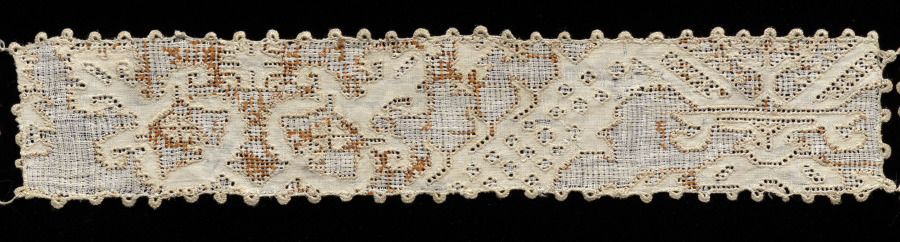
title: Lace Collar (part of a set, with cuffs)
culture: Italy, 1800s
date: 1800s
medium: Linen: needle lace (drawnwork)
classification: Lace